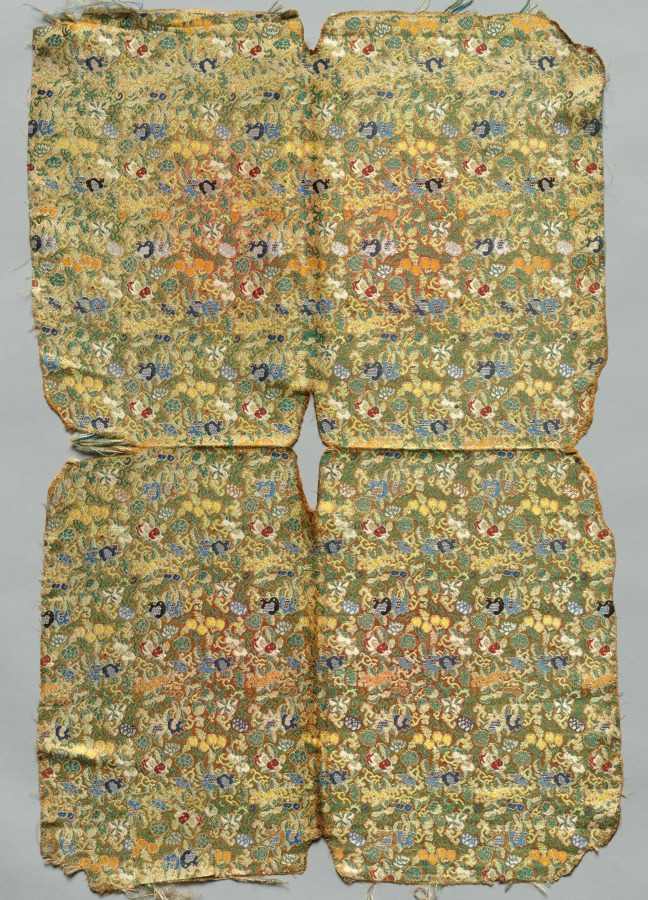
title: Fragment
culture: China, Qing dynasty (1644-1911)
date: 1800s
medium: Silk; damask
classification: Textile